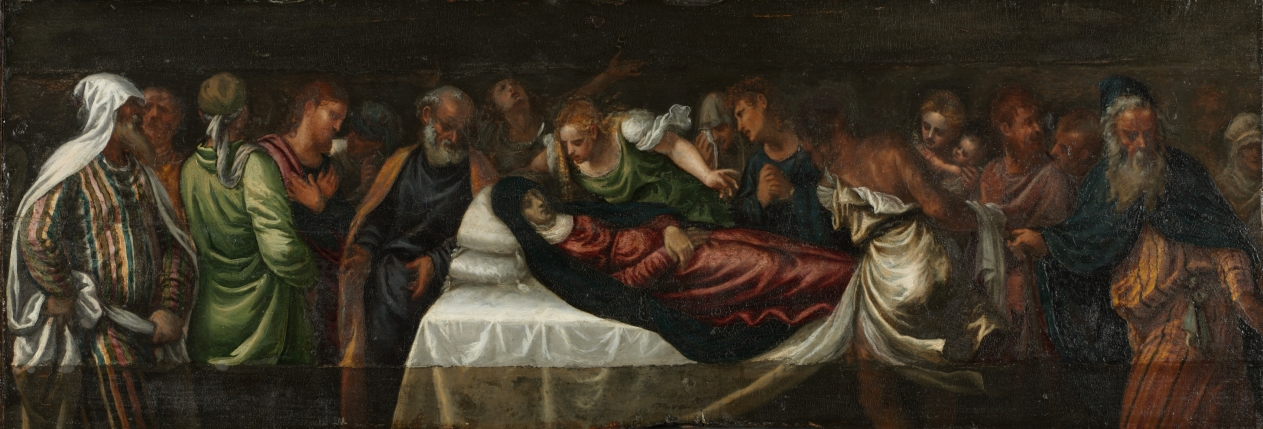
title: Death of the Virgin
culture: Italy, Venice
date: mid-1500s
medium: oil on wood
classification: Painting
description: This panel reveals a long history of changes. The initial work was painted on a single slab of wood, with strips left unpainted along the top and bottom. At an unknown time, the panel was probably cut down on the right and left sides, and the two blank strips at the top and bottom were filled in to enlarge the picture, most likely to fit its current, elaborately carved, 18th-century frame. Although these additions must have been initially more convincing, they were painted to match the yellowed and darkened original image, and thus no longer match the original paint. The flat and mismatched handling of the draperies in the lower portion also signal the intervention of a subsequent hand. The painting may have been part of an altarpiece as the predella, a long, horizontal painting along the base. The bottom of this panel exhibits signs of damage from fire and smoke, perhaps from the candles that could have been placed in front of it.